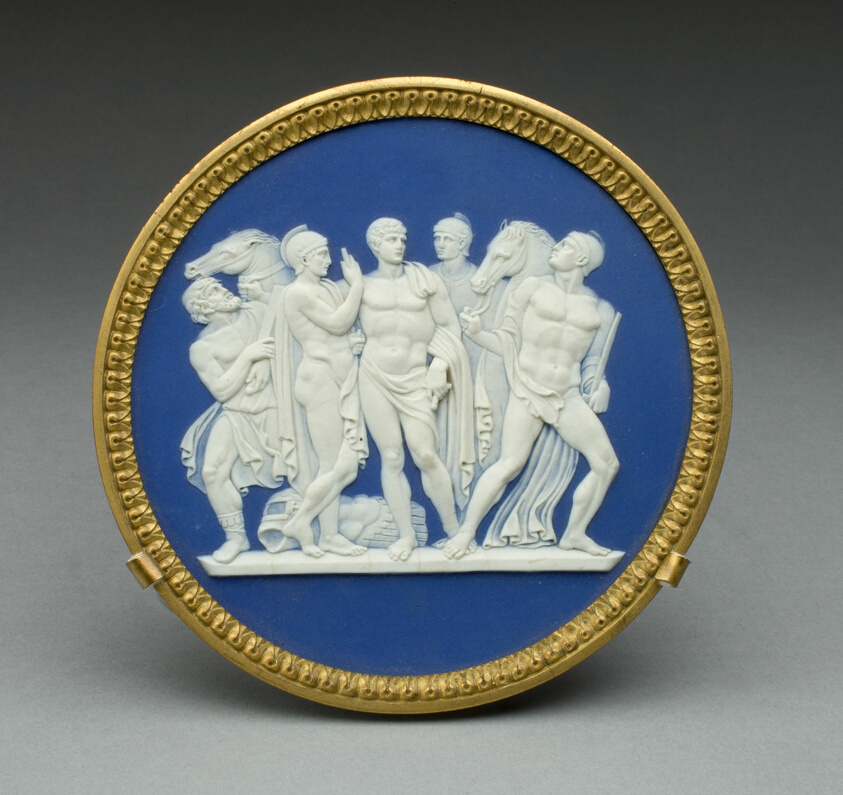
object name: Ceramics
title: Plaque with Arming of Achilles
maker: Wedgwood Manufactory (England, founded 1759)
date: 1790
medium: Stoneware (jasperware)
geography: Burslem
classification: sculpture; stoneware; european decorative arts; ceramics